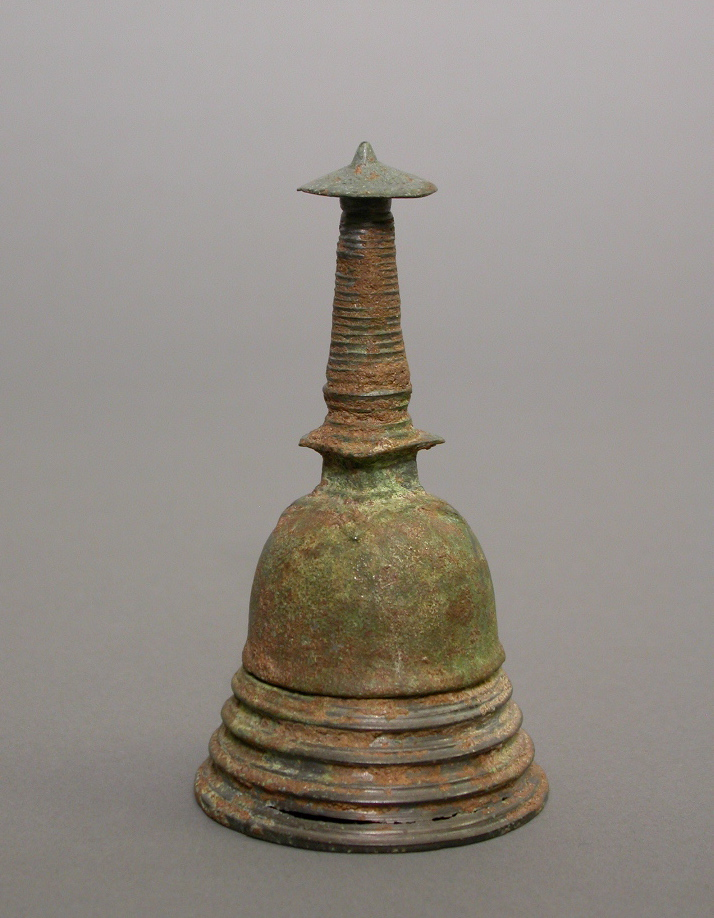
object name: Religious/Ritual Object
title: Stupa Reliquary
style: South Asian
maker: Sri Lanka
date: Polonnaruva period, 12th century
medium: Bronze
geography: Sri Lanka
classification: reliquary; container; bronze; metal; asian art; ritual objects